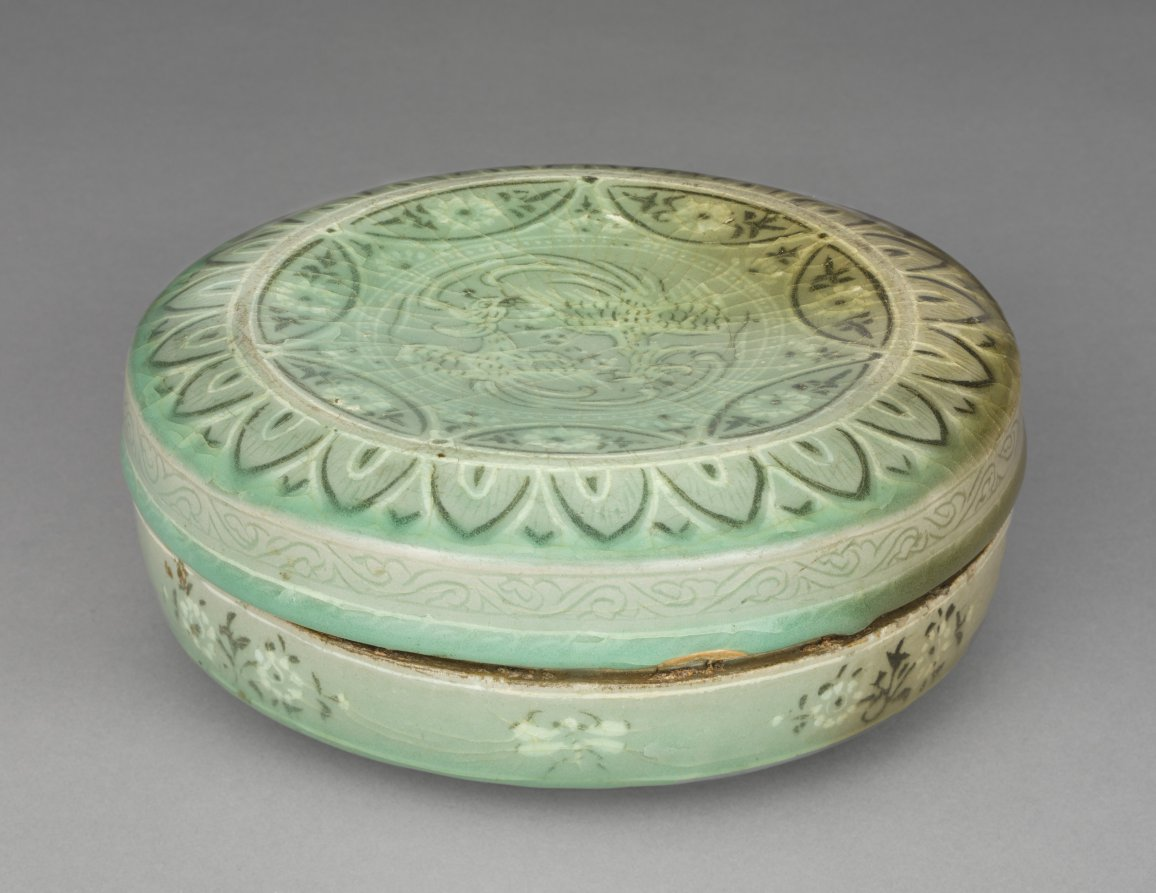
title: Box and Cover with Inlaid Phoenix Design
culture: Korea, Goryeo dynasty (918–1392)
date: 918–1392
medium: earthenware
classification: Ceramic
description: Celadons, spoons, seals, and bronze mirrors were the most common burial objects in tombs during the Goryeo period (918–1392). Once used to contain colored powder, rouge, and eyebrow gel for makeup, this small container was one of the standard goods that furnished elites' tombs. Both women and men used the grain powder of rice or millet for whitening their skin, safflower extract for rouge, and plant ash or soot for eyebrow gel. Yet, natural-looking makeup seems to have been the most favorable one in Korea according to the travelogue by Xu Jing (1091–1153), the Chinese diplomat who visited Korea in 1123.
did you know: This lidded ceramic container was used to store either incense or cosmetics.